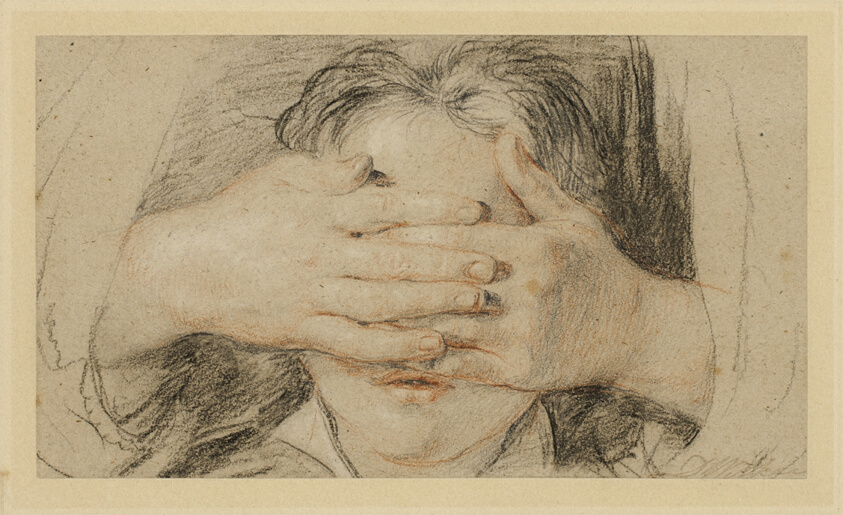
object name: Drawing and Watercolor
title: Guess My Name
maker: Sir David Wilkie; Scottish, 1785–1841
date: 1821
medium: Black and red Conté crayon, with graphite, heightened with white chalk on tan laid paper, laid down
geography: United Kingdom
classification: prints and drawing; chalk; graphite; conté crayon; drawings (visual works)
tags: children